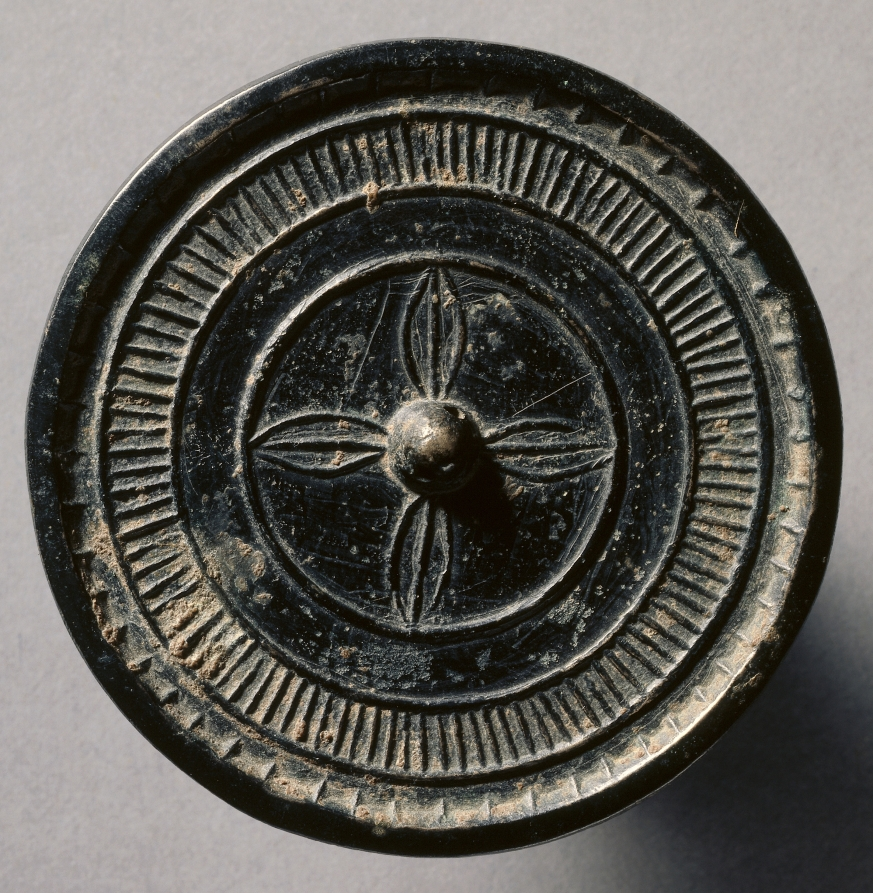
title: Mirror with Four Leaves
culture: Eastern Anatolia or Northern Mesopotamia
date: 1100s–1200s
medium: bronze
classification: Metalwork